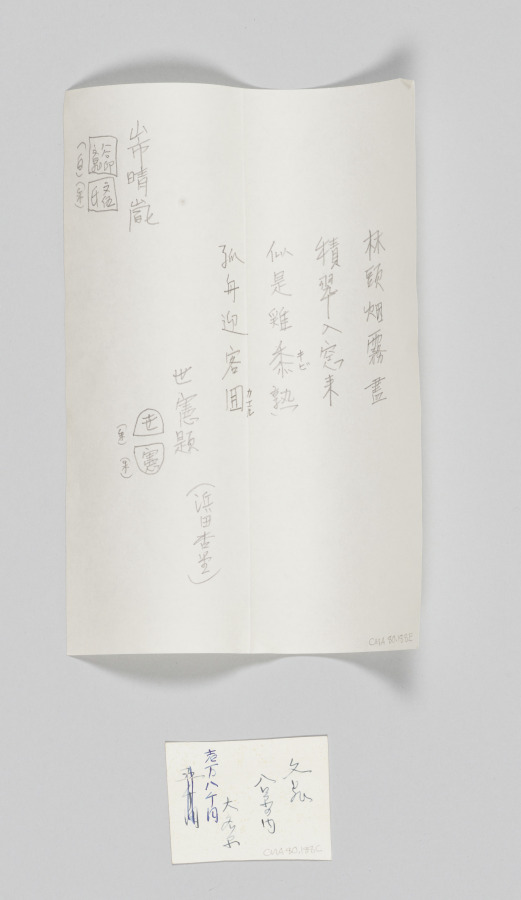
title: Mountain Market in Clearing Mist, from Eight Views of Xiao-Xiang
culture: Japan, Edo period (1615–1868)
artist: Tani Bunchō (Japanese, 1763–1841)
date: 1788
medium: album leaf remounted as a hanging scroll; ink and color on paper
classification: Painting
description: This painting was part of a set of album leaves representing the Eight Views of Xiao-Xiang, a theme originating in Chinese poetry and painting that spread to both Korea and Japan. Southern China’s Xiao-Xiang area, where the mist-covered banks of the Xiang River created a complex landscape shifting like the moods and minds of people, captured the imaginations of generations of painters and calligraphers. Inscriptions on these works suggest that they were possibly ordered by newly prominent Japanese Confucian scholars.